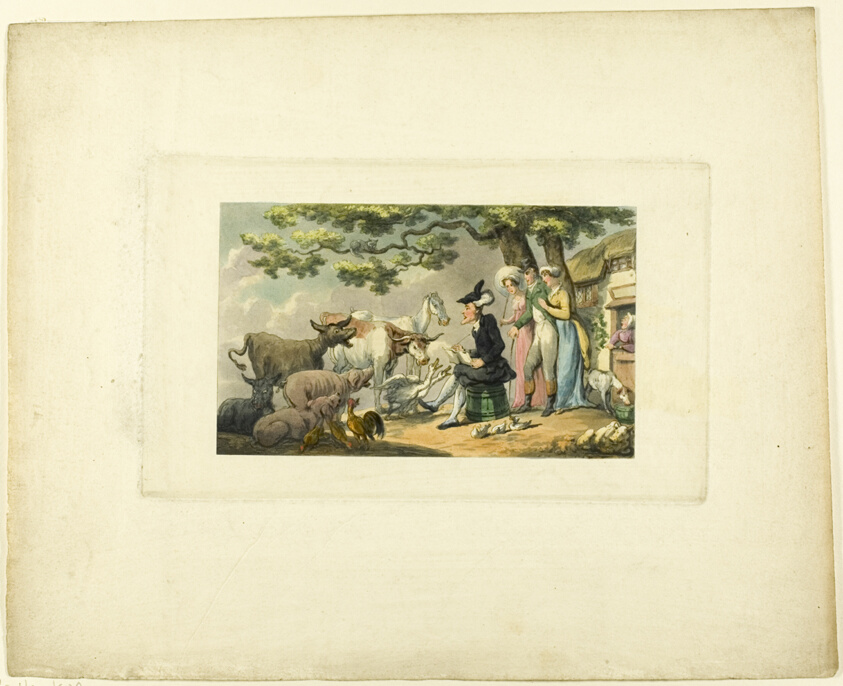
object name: Print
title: Doctor Syntax Drawing After Nature, from The Tour of Doctor Syntax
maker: Thomas Rowlandson (English, 1756-1827); published by Rudolph Ackermann (English, 1764-1834)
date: c. 1812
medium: Hand-colored etching and acquaint on ivory wove paper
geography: England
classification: etching; print; prints and drawing